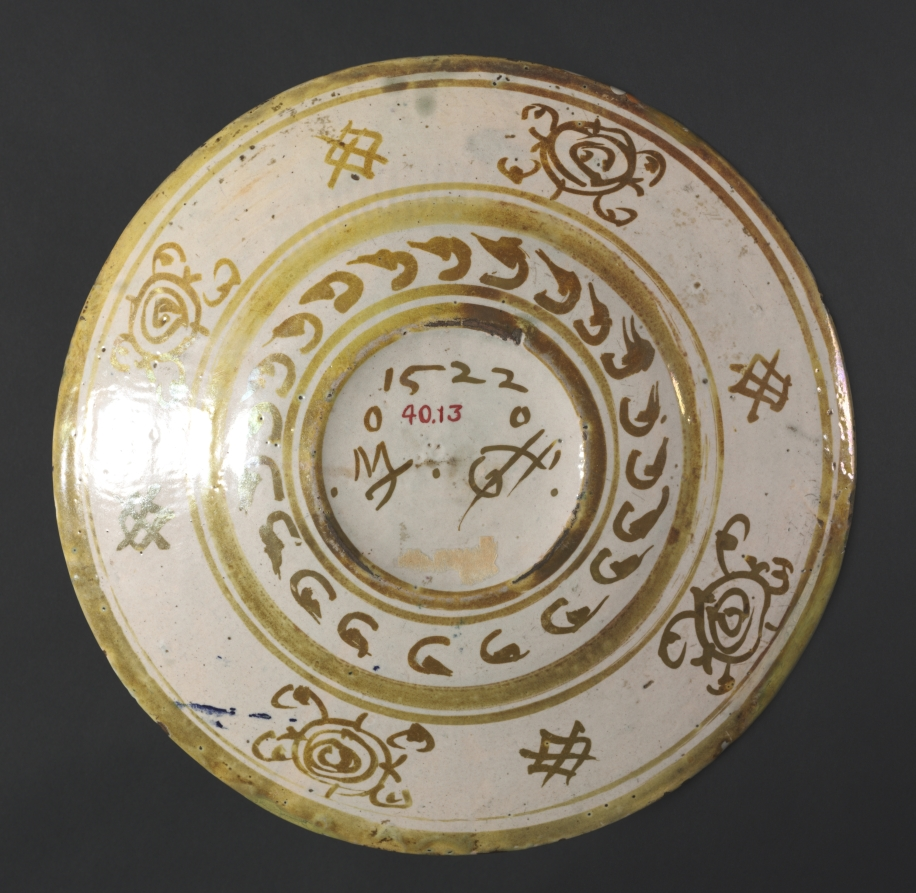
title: Plate: Diana and Acteon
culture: Italy, Gubbio, 16th century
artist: Maestro Giorgio Andreoli (Italian, 1465?–1553)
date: 1522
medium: tin-glazed earthenware with gold and red lustre (maiolica)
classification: Ceramic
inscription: signed: Mo Go 1522.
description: Alfred Pringsheim was a German Jewish collector. During Kristallnacht, in November 1938, the SS seized Pringsheim's maiolica collection from his home in Munich. It was stored in the annex to the Bayerishches National Museum, Munich. In March 1939, the German Ministry of Trade authorized export of Pringsheim's maiolica collection to London for auction at Sotheby's, provided that 80% of the proceeds up to £20,000 and 70% of the remainder be paid to the German Gold Discount Bank in foreign currency. Pringsheim was to receive the remaining proceeds. In exchange, Pringsheim and his wife were allowed to emigrate to Switzerland. After the war, the Pringsheim heirs received restitution of the sale proceeds paid to the Reichsbank.